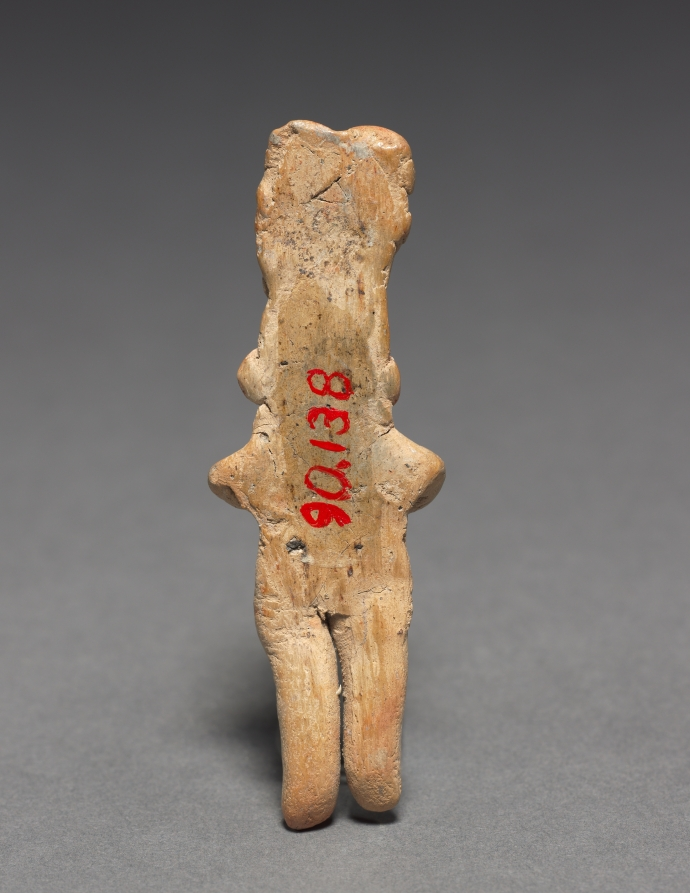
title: Female Figurine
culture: Mesoamerica, Mexico, Guanajuato, Chupícuaro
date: c. 400–100 BCE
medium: earthenware with pigment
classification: Sculpture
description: Small, solid, hand-modeled figurines were a staple of the early Mesoamerican artistic repertoire. Made in distinctive styles corresponding to geographic regions, they likely were used in a variety of contexts, including rites to assure health, fertility, and prosperity. This example is from the Chupícuaro region, north of modern-day Mexico City.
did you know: This figurine is small enough to fit comfortably in the palm of a hand.